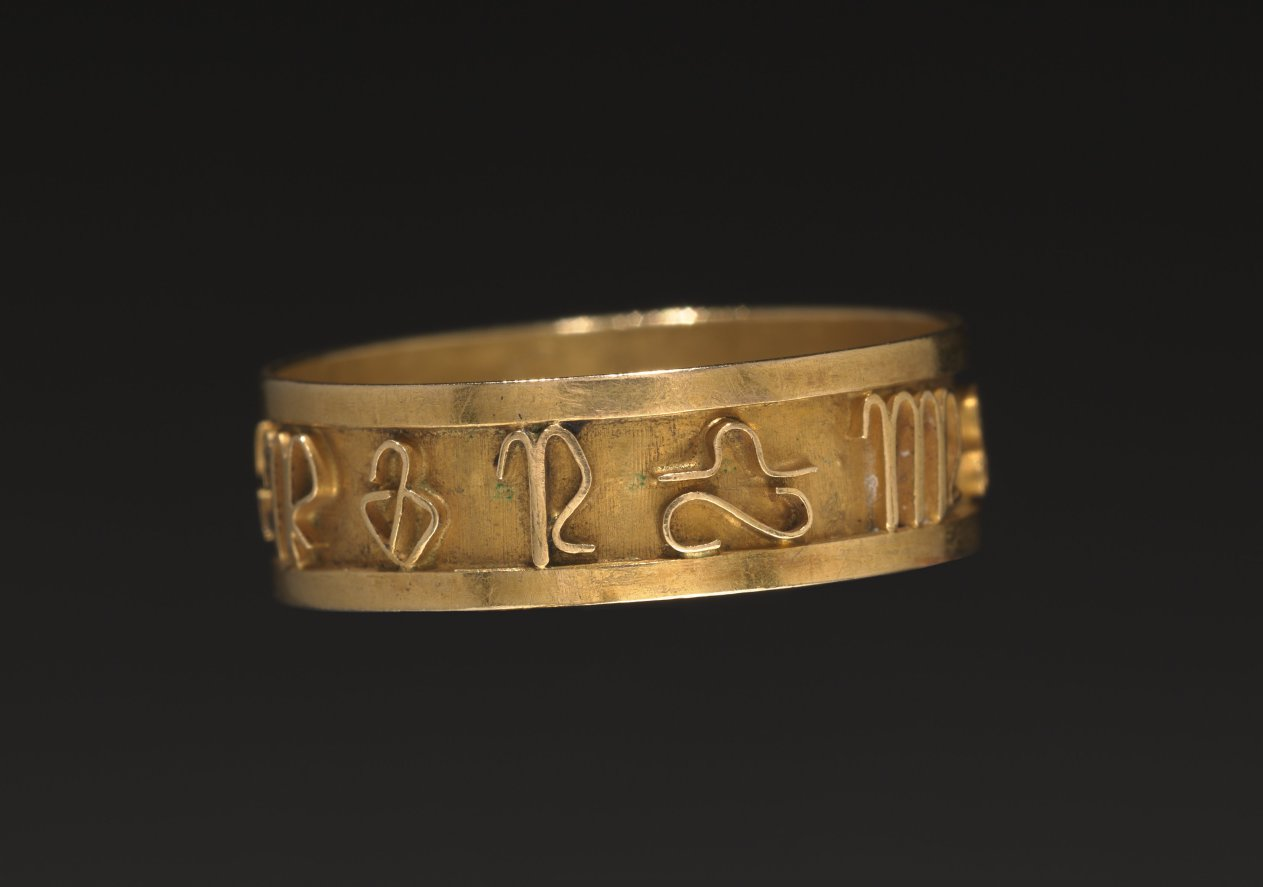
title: Ring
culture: Africa, North Africa, unknown maker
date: 1700s–1800s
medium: Gold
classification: Jewelry